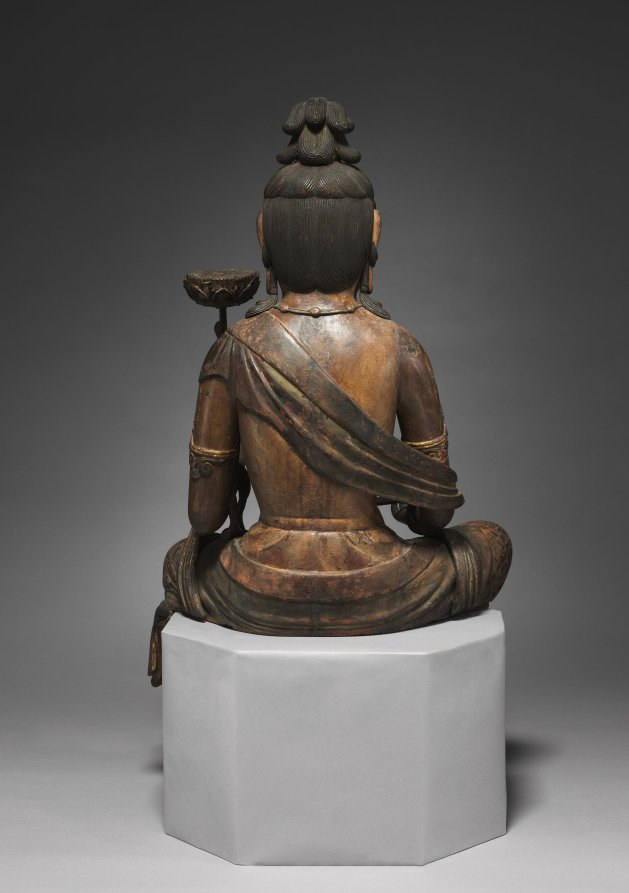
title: Bodhisattva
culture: Japan, Kamakura period (1185–1333)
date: mid-1200s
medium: wood with traces of lacquer, polychromy, and cut gold lear (kirikane)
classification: Sculpture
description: A Bosatsu (Bodhisattva in Sanskrit) is a being that has attained enlightenment but has compassionately refrained from entering nirvana in order to save others. As an attendant of Buddha, Bosatsu assumes many forms, all of which are worshipped as deities in Japanese Buddhism.